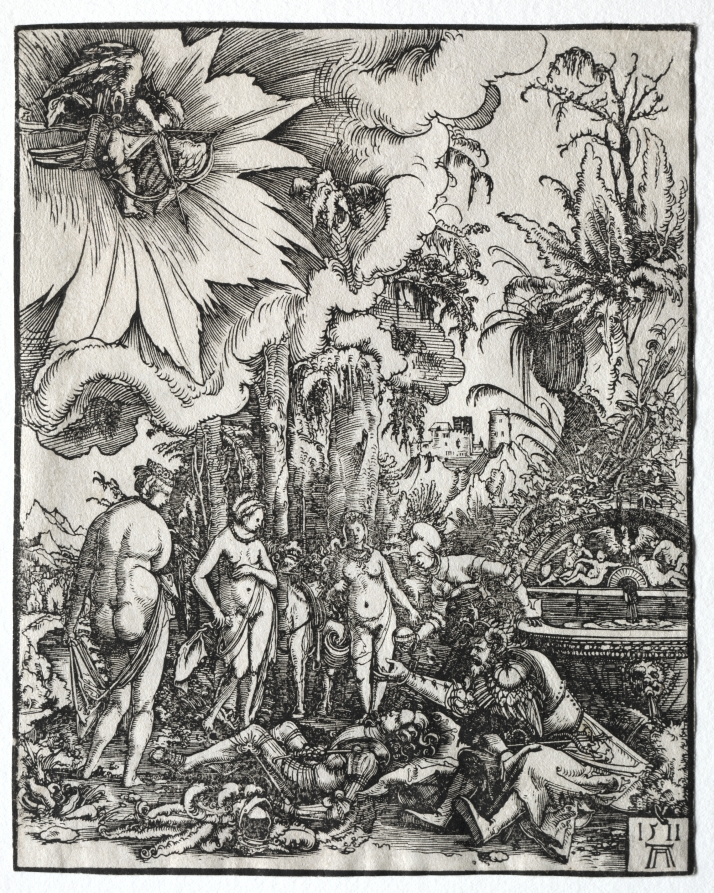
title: The Judgment of Paris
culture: Germany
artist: Albrecht Altdorfer (German, c. 1480–1538)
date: 1511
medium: woodcut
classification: Print